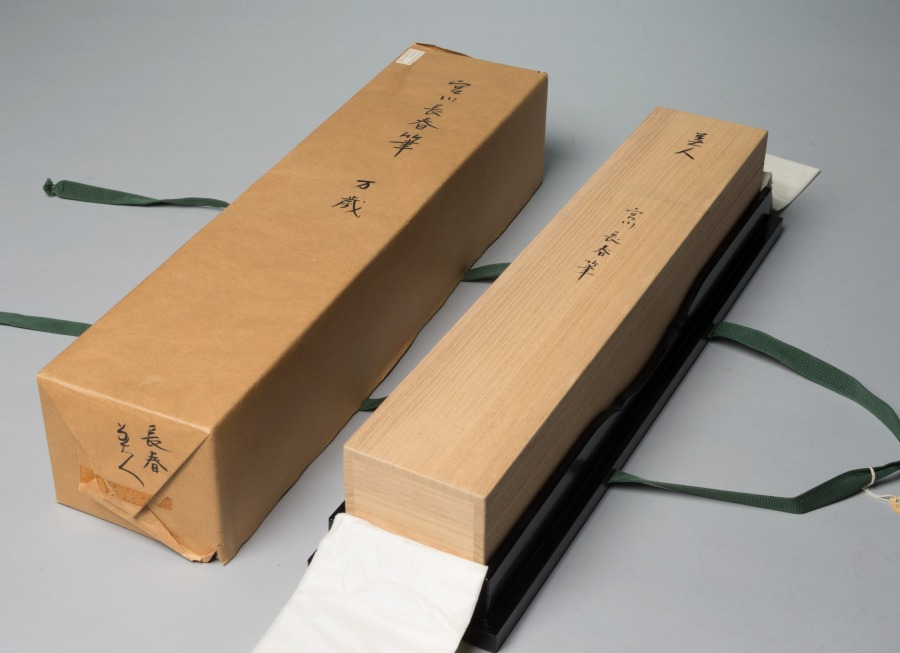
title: Spring Dancers (Manzai)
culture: Japan, Edo period (1615–1868)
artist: Miyagawa Chōshun (Japanese, 1683–1753)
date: early to mid-1700s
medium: hanging scroll; ink and color on paper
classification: Painting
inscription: Artist's signature and gourd-shaped seal lower right corner.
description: Manzai is the Japanese term for wandering comic dancers. The painting depicts one of the traditional pleasures of the spring season.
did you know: One performer is playing a hand-held drum, like CMA 1918.349.